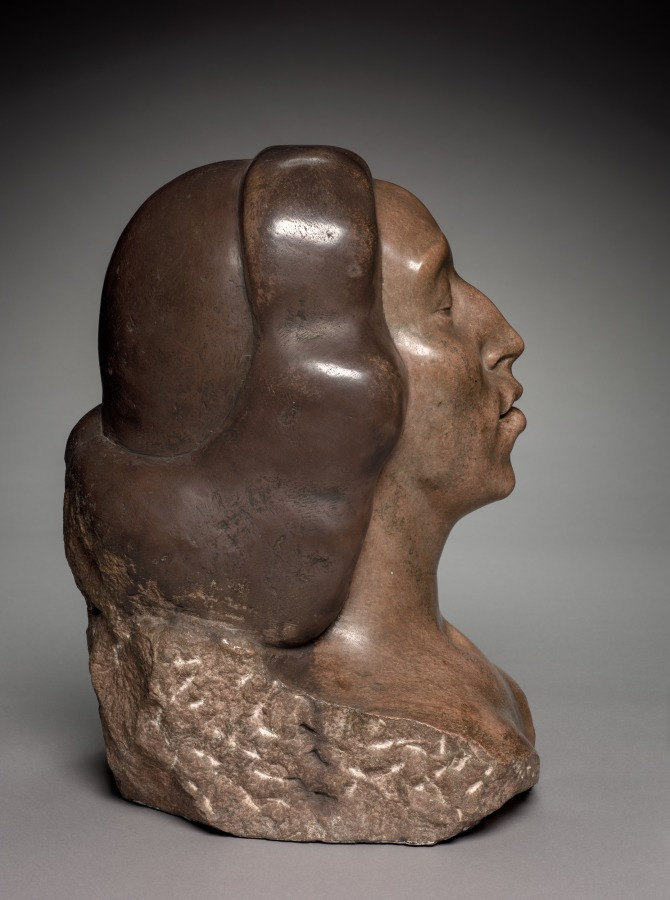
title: Head of Woman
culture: America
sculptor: Gaston Lachaise (American, born France, 1882–1935)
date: 1920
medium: pink Tennessee marble and black pigment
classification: Sculpture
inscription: Signed on base: G. LACHAISE 1923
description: Gaston Lachaise acknowledged that his wife, Isabel Dutaud Nagel Lachaise, was "the primary inspiration which awakened my vision and the leading influence that has directed my forces." Head of a Woman is one of several sculpted portraits he made of her.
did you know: Born in Paris, France, Gaston Lachaise immigrated to the United States in 1906.